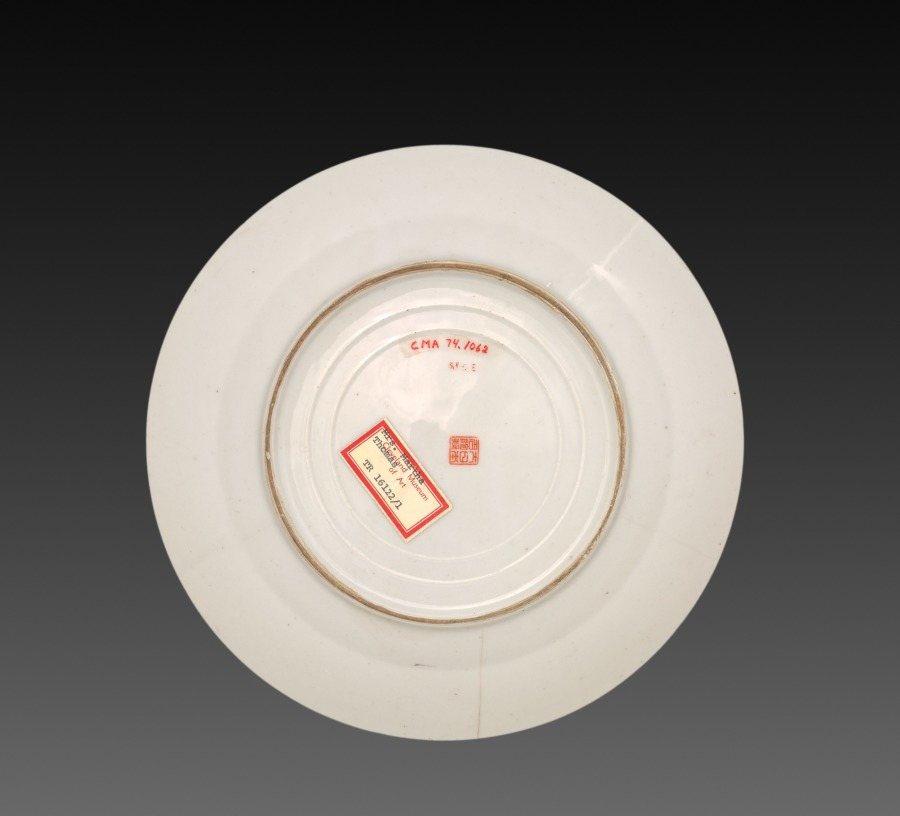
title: Plate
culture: Japan, Meiji period (1868–1912)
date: early 1900s?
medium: enamelled porcelain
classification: Ceramic